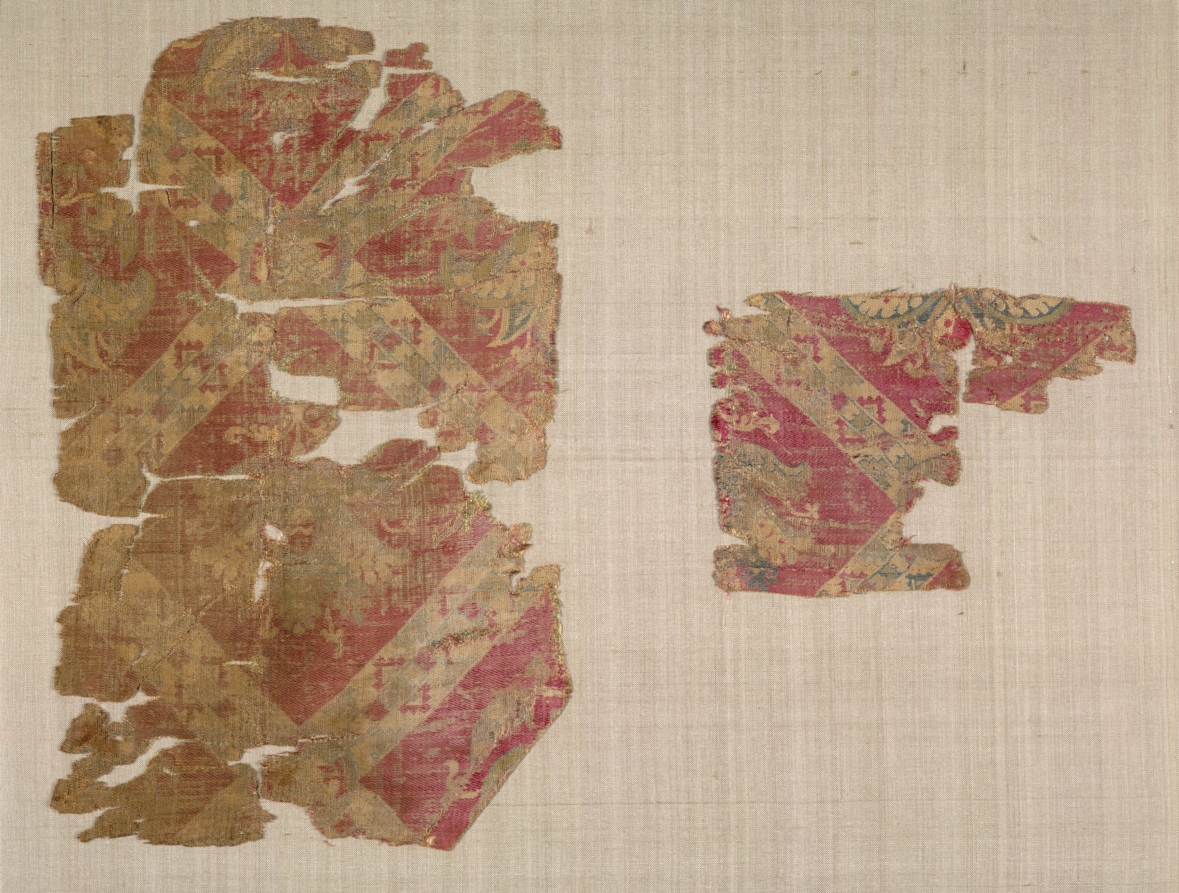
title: Silk Fragments with Palmette Blossoms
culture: Egypt or Syria, Umayyad period (661–750) or Abbasid period (750–1258)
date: 700s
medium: Silk: complementary weft-faced twill with inner warps (samit)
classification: Textile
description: The stunning pattern of palmettes within diamond-shaped compartments is still visible in this rare four-color silk, despite its fragile state. Small human faces within circles appear at the points of the diamonds.